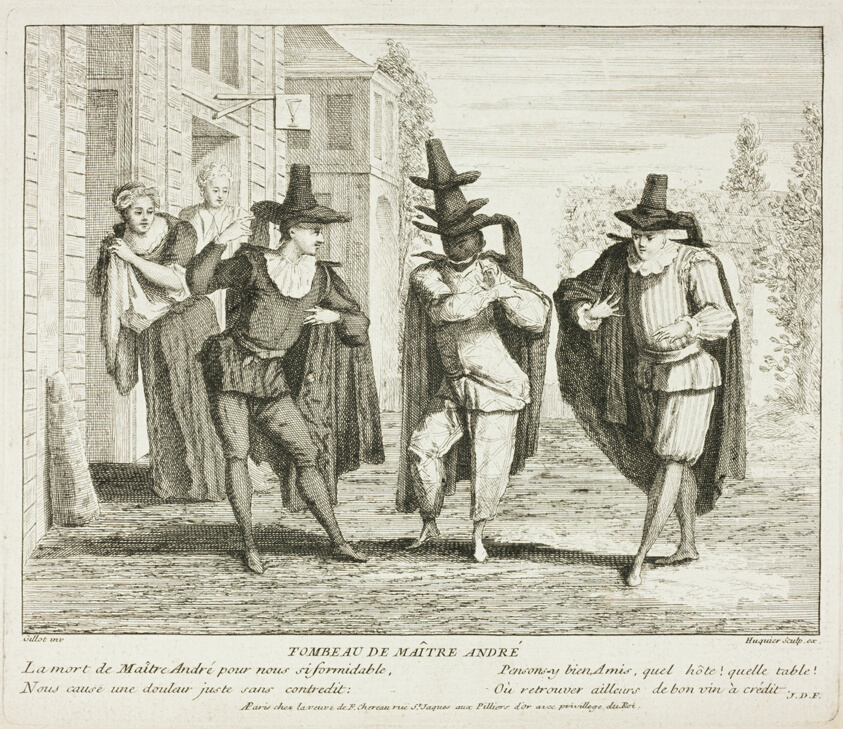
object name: Print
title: Plate from Livre de Scènes Comiques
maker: Gabriel Huquier (French, 1695-1772); after Claude Gillot (French, 1673-1722)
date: 1729/32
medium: Etching on paper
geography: France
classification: etching; print; prints and drawing